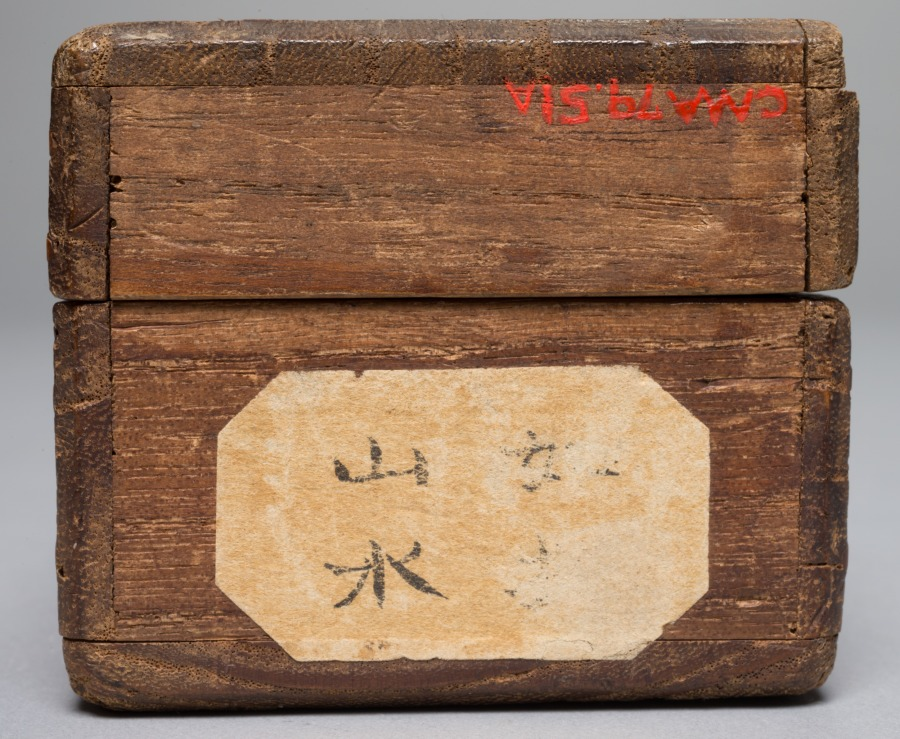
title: Landscape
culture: Japan, possibly Edo period (1615-1868)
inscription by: copy after Ishō Tokugan (Japanese, c. 1359–1437)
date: early 1600s to mid-1800s?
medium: hanging scroll; ink and slight color on paper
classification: Painting